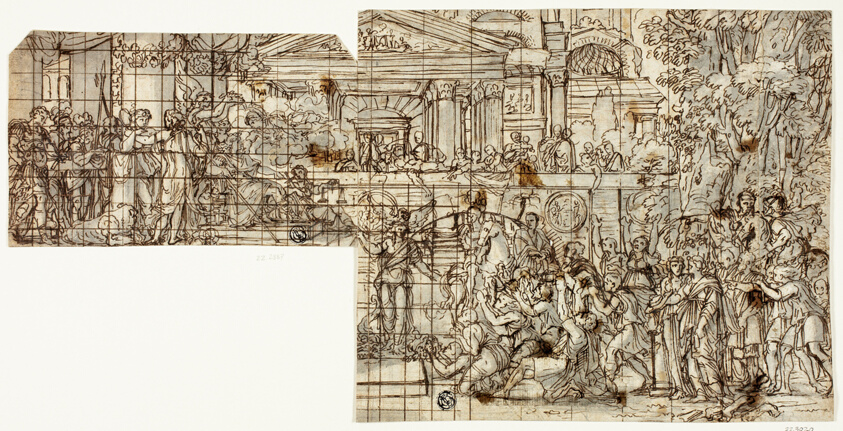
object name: Drawing and Watercolor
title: Mythological Scene: Triumph of Alexander (recto)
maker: Possibly François Chauveau (French, 1613-1676); or possibly Charles Le Brun (French, 1619-1690); or possibly Sébastien Bourdon (French, 1616-1671)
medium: Pen and iron gall ink, with brush and gray wash, and traces of red chalk, over traces of graphite, on cream laid paper (pieced)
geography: France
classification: pen and ink drawings; drawings (visual works); prints and drawing